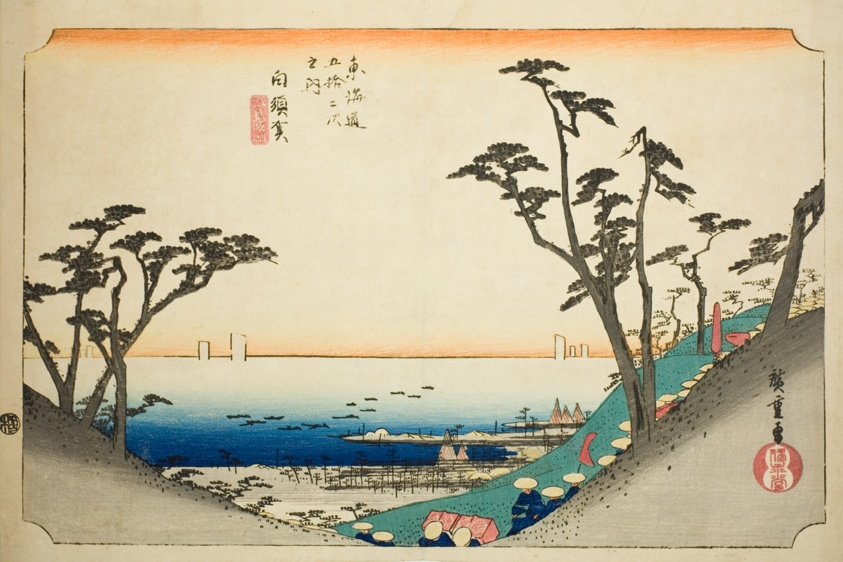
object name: Print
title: Shirasuka: View of Shiomi Slope (Shirasuka, Shiomizaka zu), from the series "Fifty-three Stations of the Tokaido (Tokaido gojusan tsugi no uchi)," also known as the Hoeido Tokaido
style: Japanese (culture or style)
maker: Utagawa Hiroshige 歌川 広重; Japanese, 1797-1858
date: c. 1833/34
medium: Color woodblock print; oban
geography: Japan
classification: woodblock print; print; asian art